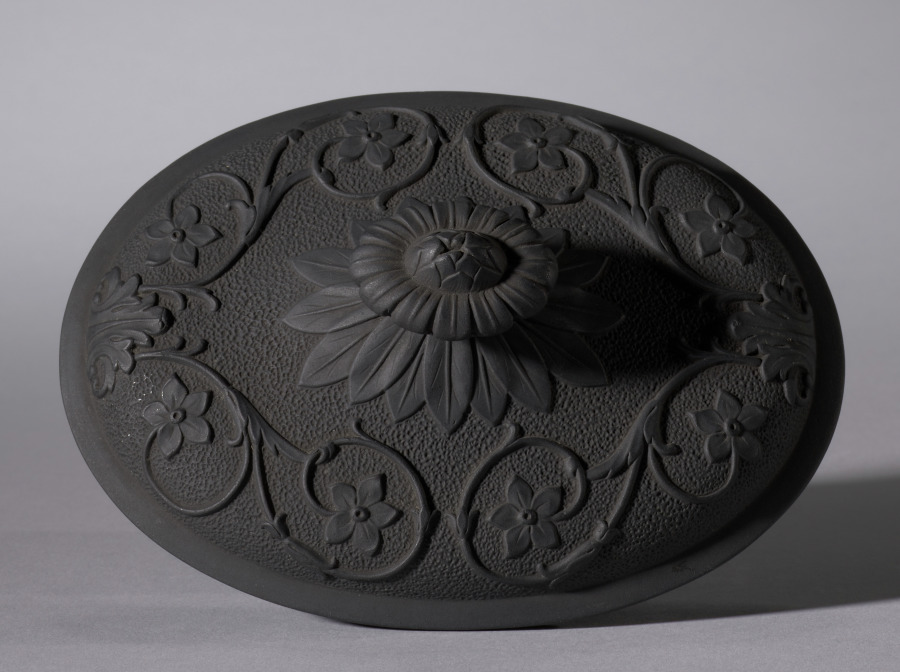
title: Teapot (cover)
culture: England, 19th century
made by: Elijah Mayer (British, c. 1770–1805)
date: c. 1810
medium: black basalt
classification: Ceramic